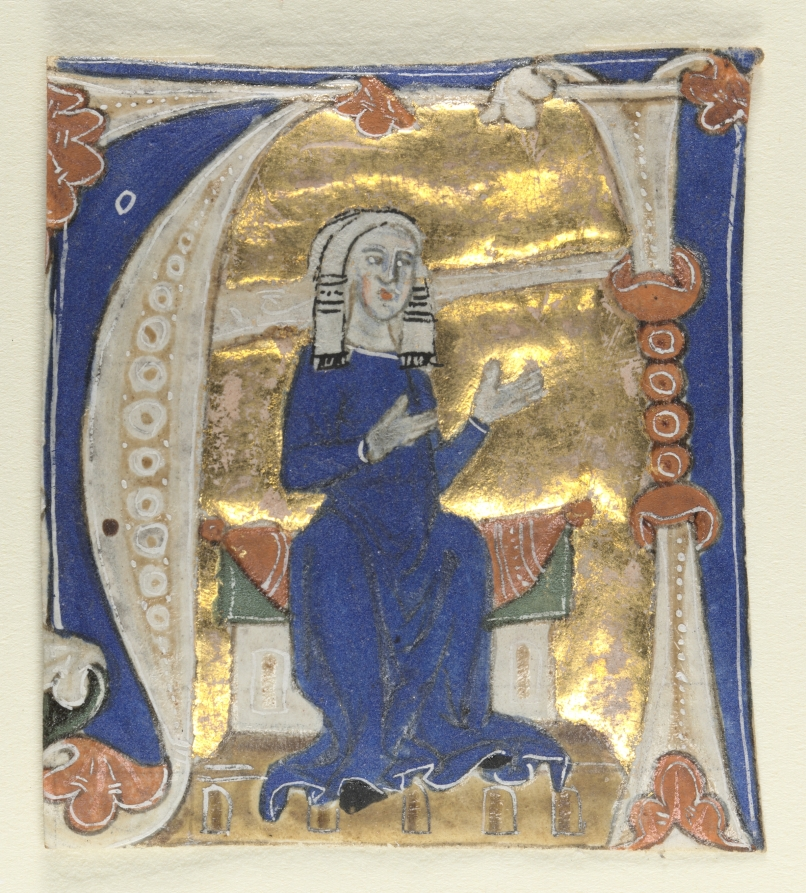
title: Historiated Initial (A) Excised from a Bible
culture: Italy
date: 1200s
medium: tempera and gold on parchment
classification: Manuscript